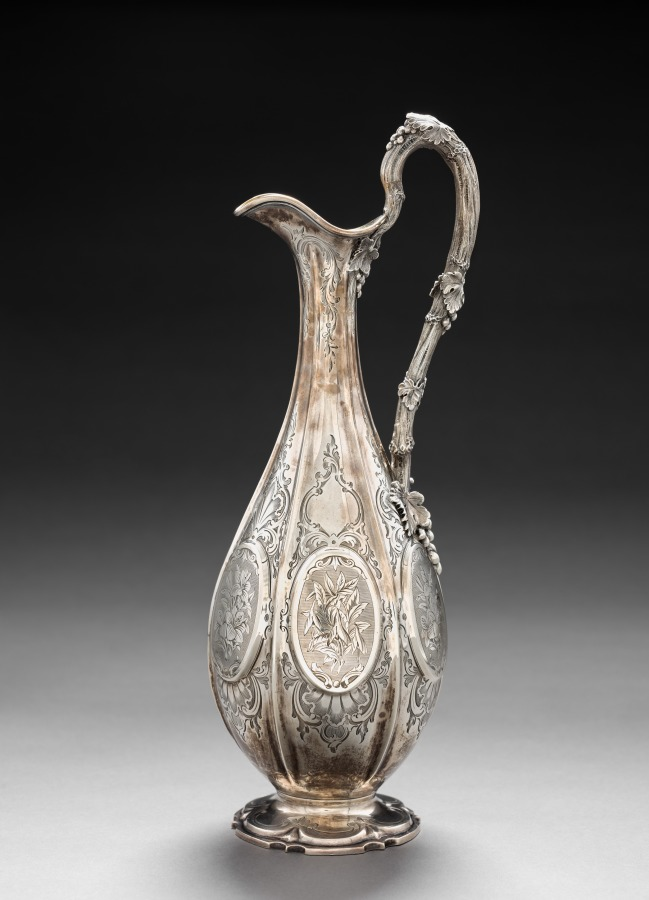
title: Pitcher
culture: England, 19th century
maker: Edward Barnard & Sons (British, c. 1680–2003)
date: c. 1870–80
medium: silver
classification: Silver